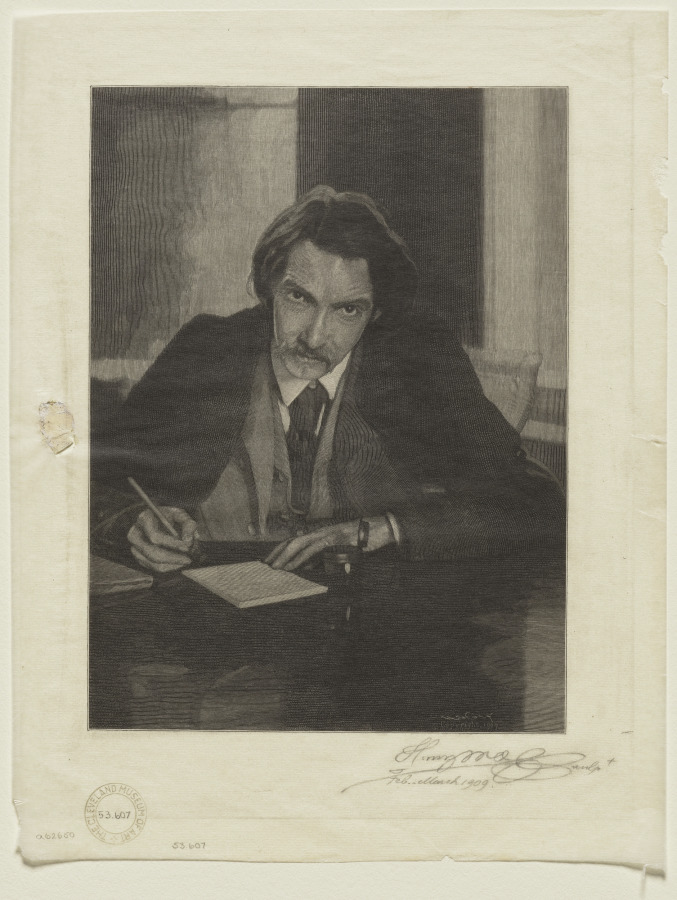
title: Robert Louis Stevenson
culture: America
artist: Henry Wolf (American, 1852–1916)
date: 1909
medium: wood engraving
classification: Print